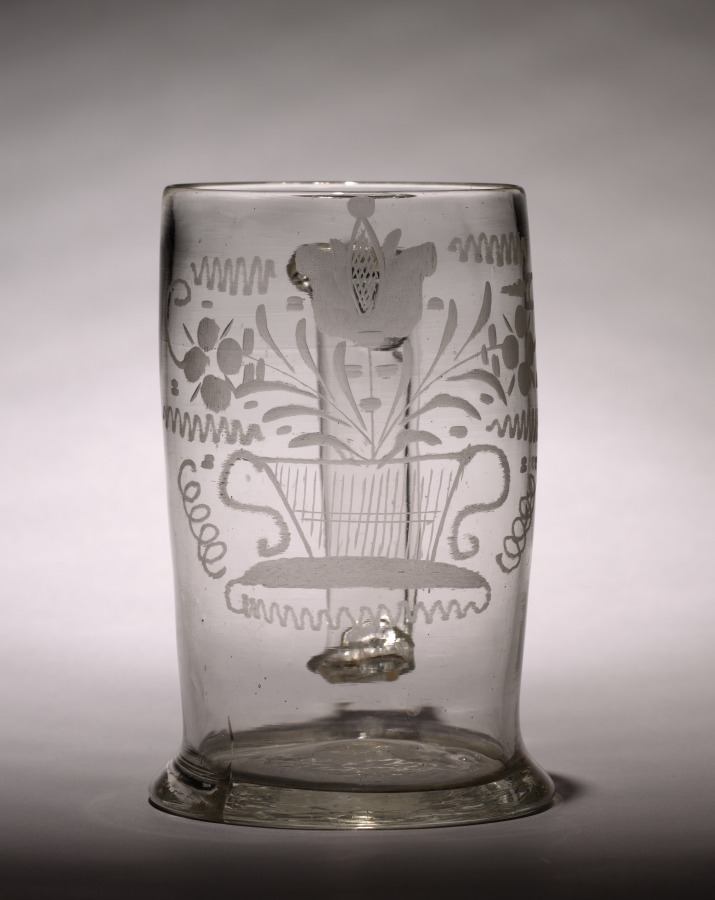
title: Handled Mug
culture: America, Stiegel Type, 18th century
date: 1700s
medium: glass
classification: Glass